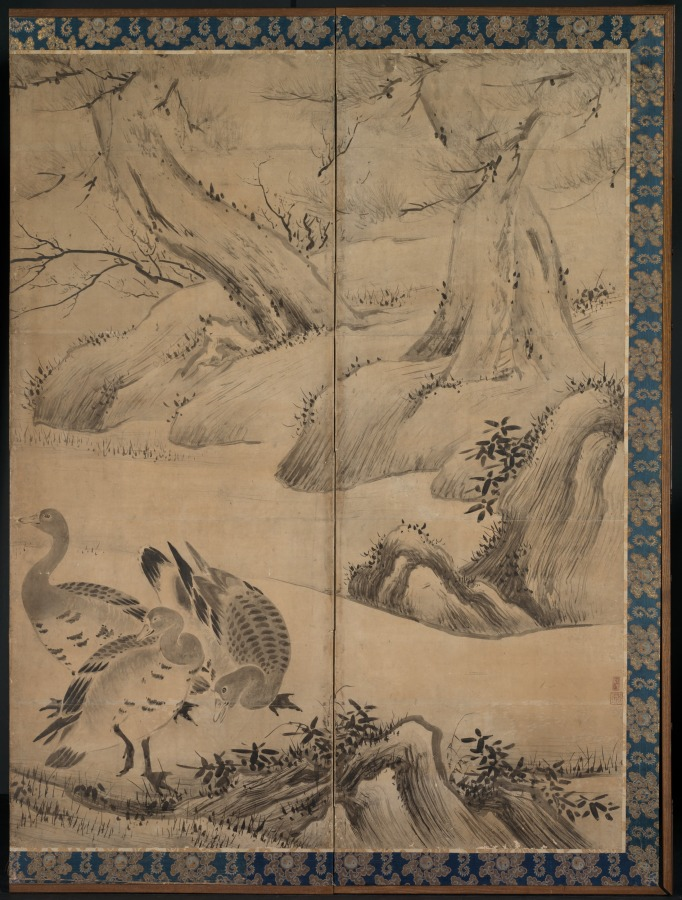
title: Wild Geese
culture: Japan, Edo period (1615–1868)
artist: Kano Sanraku (Japanese, 1559–1635)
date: late 1500s-early 1600s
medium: pair of six-fold screens; ink on paper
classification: Painting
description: Depictions of geese usually appear as ink paintings in Japan during the 1200s. They later show up in the colorful landscapes of illustrated handscrolls. Such early ink renditions of the birds have long been associated with classical Chinese Zen painting and poetry, which was avidly admired and collected in medieval Japan. In the screens on display, the artist portrayed the waterfowl in a pastoral setting without reference to classical or religious themes. Such ordinary subjects were imbued with special meaning in 14th- and 15th-century Japan through associations with continental culture, Zen thought and poetry, and famous Chinese monk-painters whose painting techniques had become revered as visual emblems of Zen principles. The screens here reflect the continuation of that painting tradition in the late 1500s or early 1600s by the head of the most important studio in Kyoto. Sanraku also executed a number of colorful folding screen compositions, but here pays homage to the style of early Zen painting.